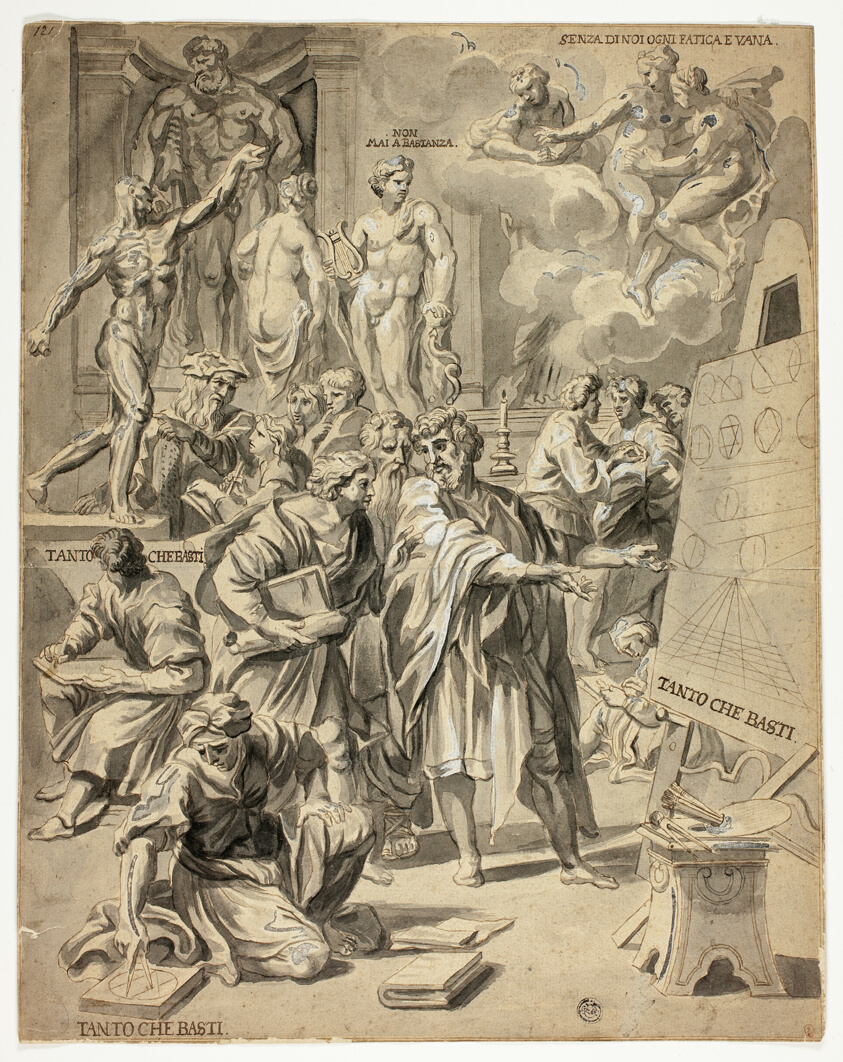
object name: Drawing and Watercolor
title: Allegorical Scene in Artist's Studio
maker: After Carlo Maratti; Italian, 1625-1713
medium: Pen and brown ink, with brush and gray wash, heightened with lead white (partly discolored), with traces of graphite, on tan laid paper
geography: Italy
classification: ink or chalk wash; drawings (visual works); prints and drawing